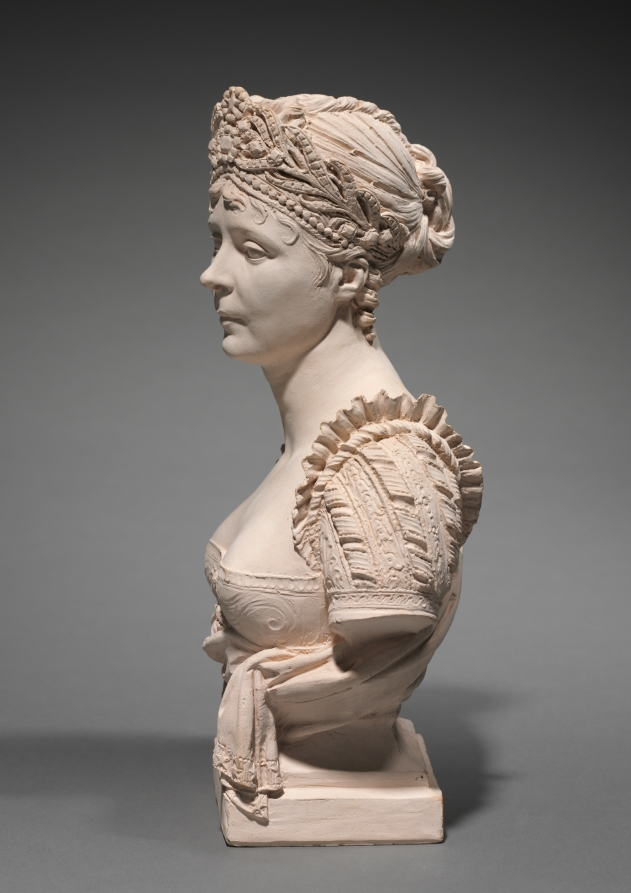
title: Bust of Empress Josephine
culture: France, 19th century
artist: Joseph Chinard (French, 1756–1825)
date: 1805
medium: terracotta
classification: Sculpture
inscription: inscribed on front of base in ligature: "chinard a milan"; inscribed on back of base in ligature: "chinard/de/l'institut m(al?)/membre de plusiere [sp]/ academies/milan-an l (3?)"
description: This bust of the Empress Josephine was sculpted in Milan in 1805 when she accompanied Napoleon to that city for his coronation as the King of Italy.